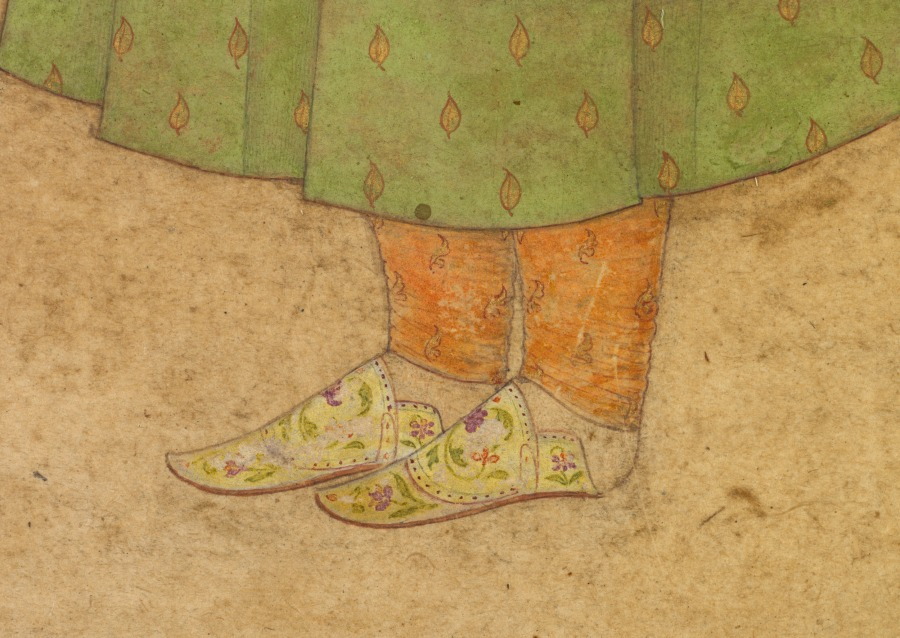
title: Portrait of Raja Ram Singh of Amber (r. 1667-1688) with a Deccan Sword (recto)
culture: India, Mughal, 17th century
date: c. 1680–85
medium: Gum tempera and gold on paper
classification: Painting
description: The sensitive, naturalistic rendering of weariness and forbearance in the face belies the trappings of favor bestowed on Ram Singh by the Mughal emperors Shah Jahan and Alamgir, whom he served as courtier and general between 1643 and 1688. He was a Hindu ruler from the kingdom of Amber in Rajasthan, under the control of the Mughal empire. Spending most of his life at the imperial court or leading military expeditions for the Mughals, this portrait was included in a Mughal album and inscribed with an Urdu verse indicating his value to the empire: "wherever he has led an expedition, victory is his." He wears a sumptuous coat of honor with a fur collar, woven with gold threads and floral sprigs and costly rubies, emeralds, and pearls. The straight sword with enameled hilt may be the one gifted to him by the emperor upon his succession to the throne as king of Amber in 1667. His long history of service at the imperial court, however, was checkered with troubles, including his allegiances with failed successors of Shah Jahan and the escape of the rebel Shivaji under his watch.